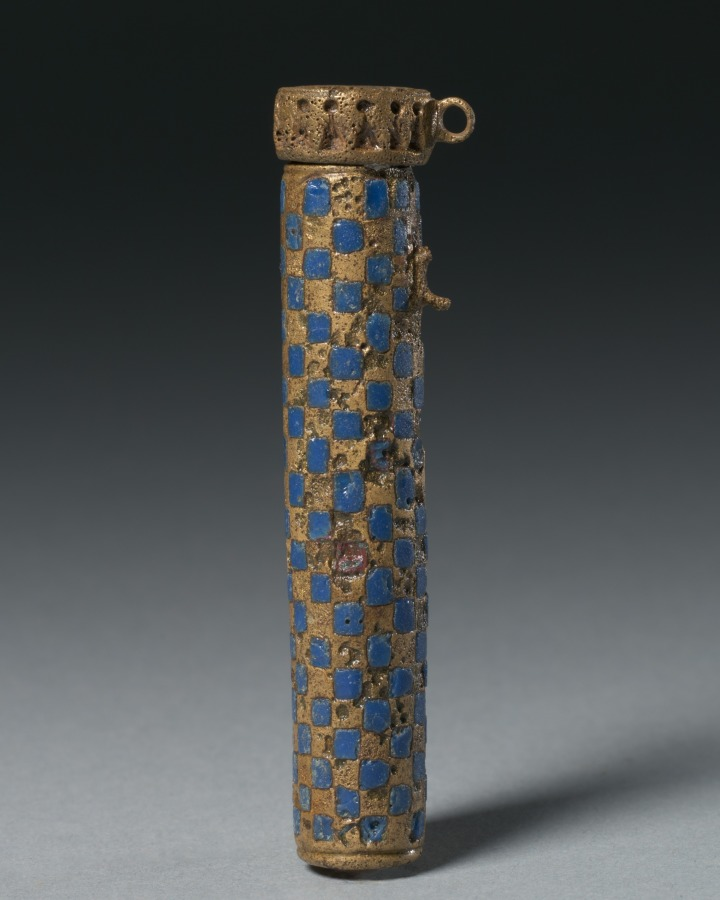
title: Kohl Tube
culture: Egypt, Greco-Roman period (332 BCE–395 CE), Ptolemaic dynasty (305–30 BCE)–Roman empire (30 BCE–395 CE)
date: 305 BCE–395 CE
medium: brass with blue enamel decoration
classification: Cosmetic Objects